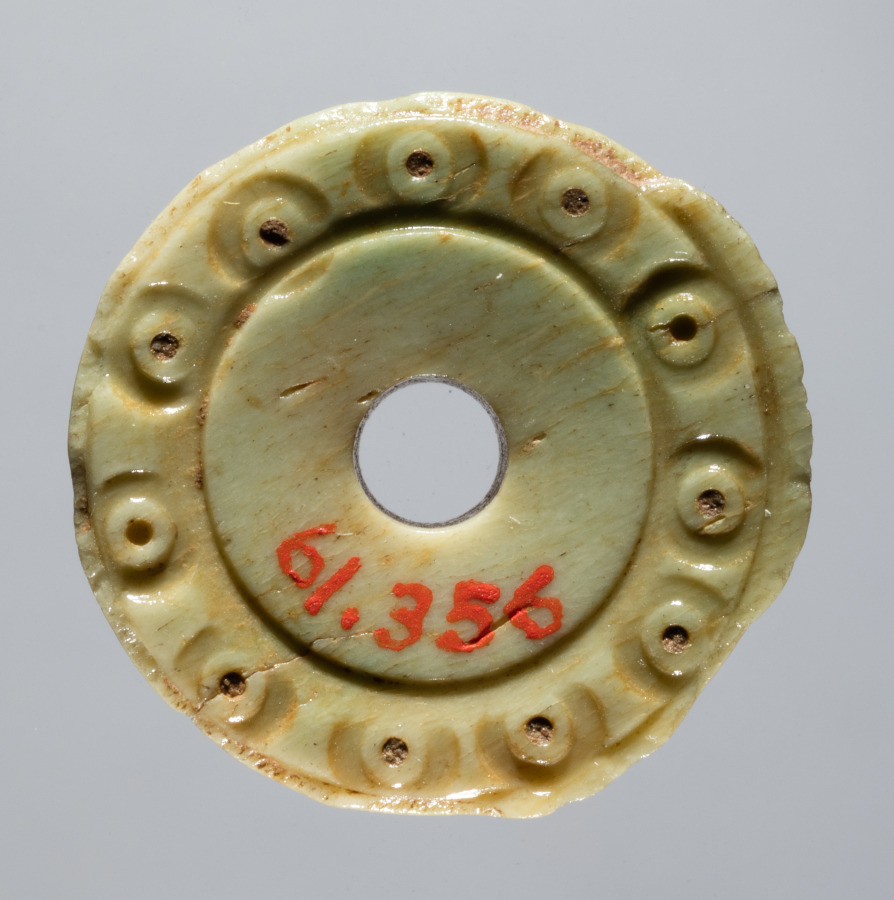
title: Spindle Whorl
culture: Iran, early Islamic period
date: 700s - 900s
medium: bone, incised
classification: Spindle Whorl